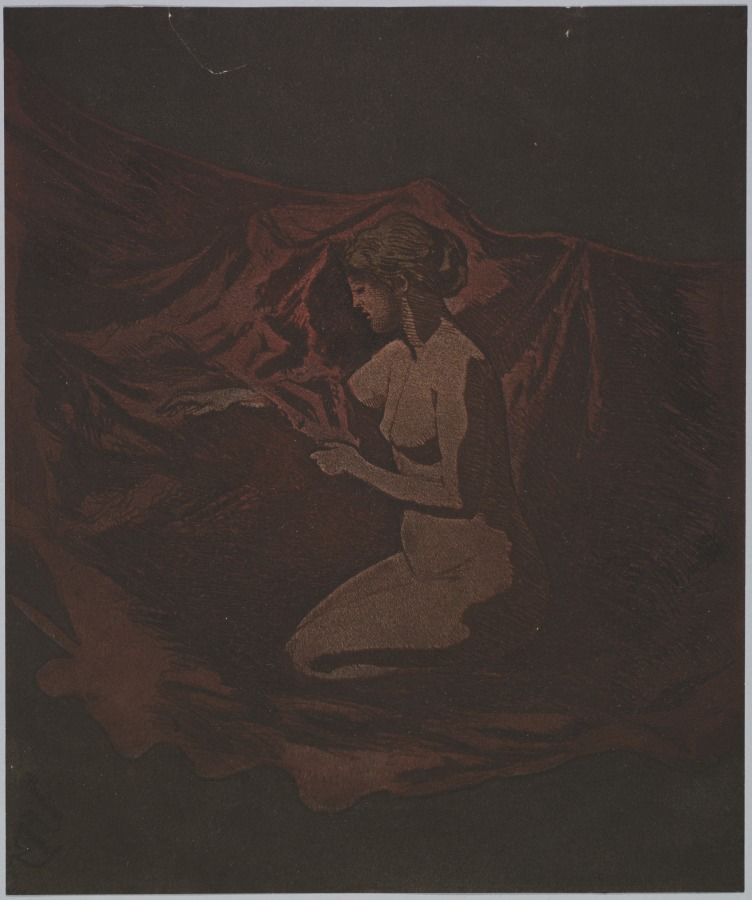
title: Embers Glow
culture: France, 19th century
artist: Theodore Roussel (French, 1847–1926)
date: 1890–1897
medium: color etching and aquatint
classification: Print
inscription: verso, in graphite: 7